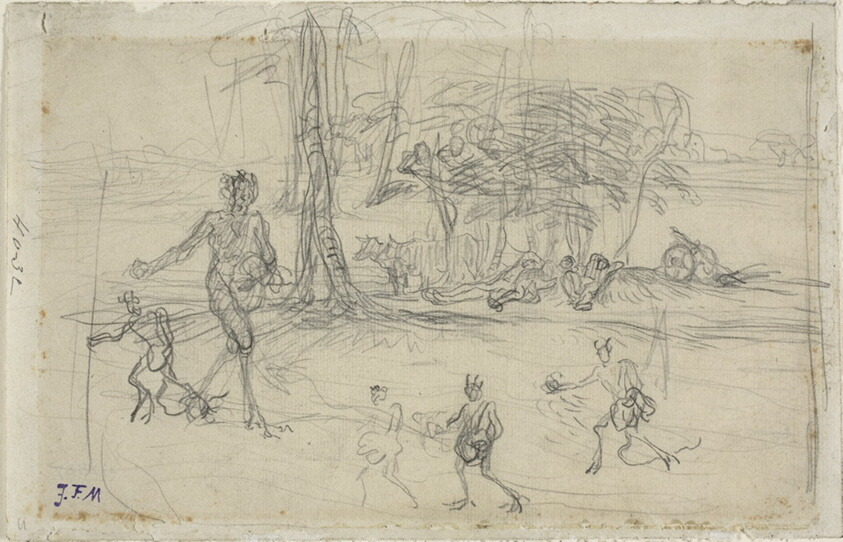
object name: Drawing and Watercolor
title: The Devil Sowing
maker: Jean François Millet (French, 1814-1875)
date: 1848/52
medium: Graphite on ivory laid paper, faded to cream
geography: France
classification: graphite; drawings (visual works); prints and drawing